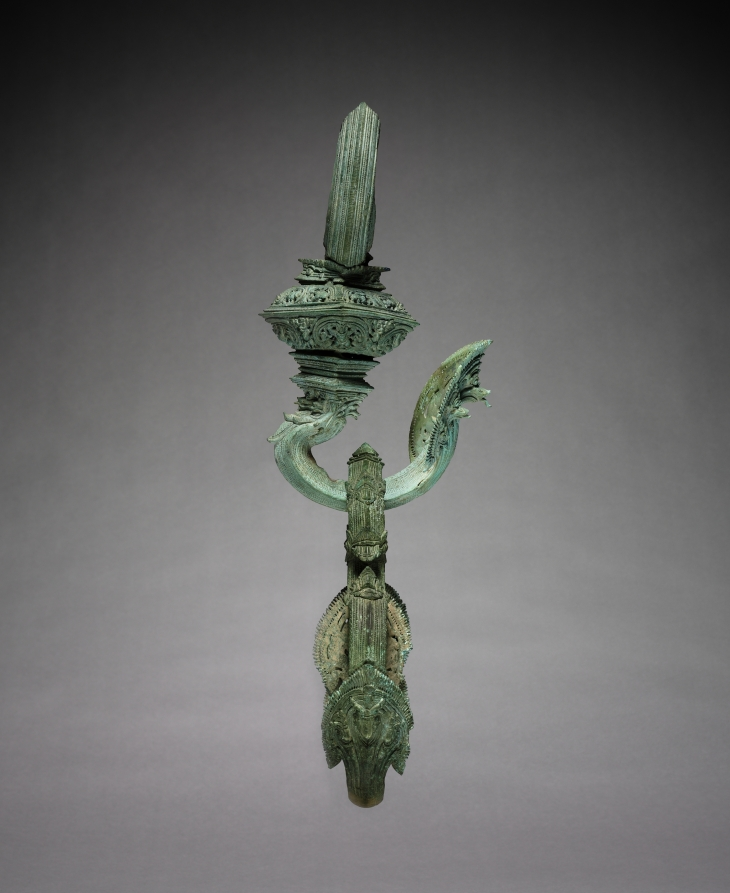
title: One of a Pair of Decorated Palanquin Hooks and Rings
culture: Cambodia, Angkor Wat Style, 12th century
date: 1100–1175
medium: bronze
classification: Sculpture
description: Hooks, suspension rings, and finials cast in bronze are very common fixtures in Cambodian decorative art. Frequently they served a practical function, such as the present set, used for a palanquin in which a person was carried from place to place. The litter or throne was fastened to the rings which in turn were suspended from the books fixed by bolts to transverse poles carried on the shoulders of the palanquin bearers. Chariots, palanquins, furniture, and harnesses were frequently embellished with various bronze decorations, finials, and fixtures. Those, as a rule, were gilded making the objects they served look very sumptuous. The relief sculpture found on various Khmer monuments, such as Angkor Wat or Bayon for instance, illustrates well the use and context of those bronze implements in ancient Cambodian life. These frequently elaborate bronze fixtures were decorated with motifs generally popular in Cambodian art: such as nagas, garudas, floral, or animal patterns. This pair of hooks and rings, unusually large in size, take on a naga form in the hooks. They are decorated with perforated floral and animal motifs done with great care and precision. The rings, suspended from hooks, are in the form of tri-fold flower stalks with naga motifs repeated at the end of the curved stalks. Such elaborate and huge hooks and rings must have, no doubt, decorated a palanquin of an important individual, possible a ruler himself. Their decoration is typical of the mature Angkor Wat style.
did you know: The naga, a water serpent with a multi-headed hood, is a Khmer national emblem.